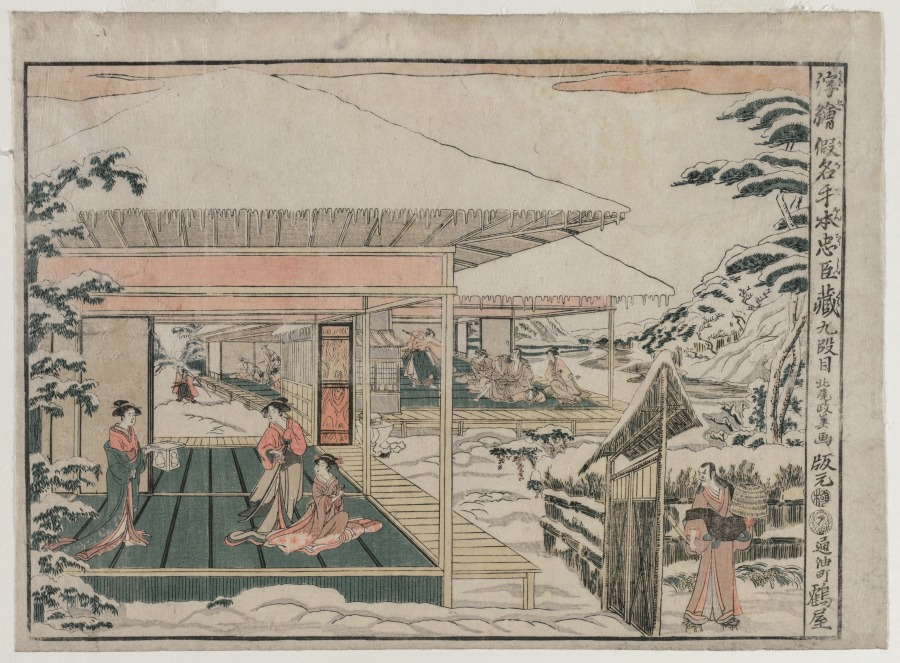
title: Chushingura: Act IX (from the series Perspective Pictures for The Treasure House of Loyalty)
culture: Japan, Edo period (1615–1868)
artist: Kitao Masayoshi (Japanese, 1761–1824)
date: c. 1790s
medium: color woodblock print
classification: Print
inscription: Signature: Kitao Masayoshi ga Publisher: Tsuruya Kiemon (hammoto Toriaburacho Tsuruya, emblem) Censorship Seal: kiwame